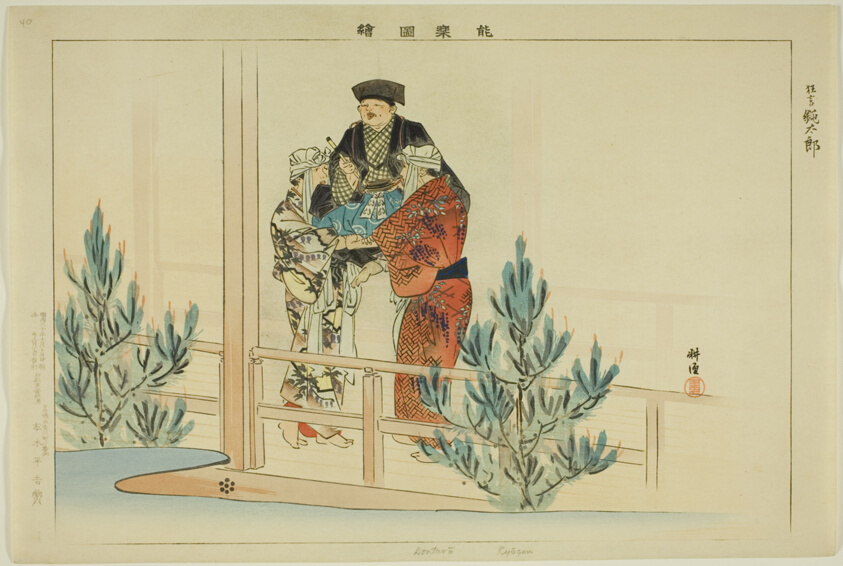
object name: Print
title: Dontaro (Kyogen), from the series "Pictures of No Performances (Nogaku Zue)"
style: Japanese (culture or style)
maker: Tsukioka Kogyo; Japanese, 1869-1927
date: 1898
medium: Color woodblock print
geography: Japan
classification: woodblock print; print; asian art